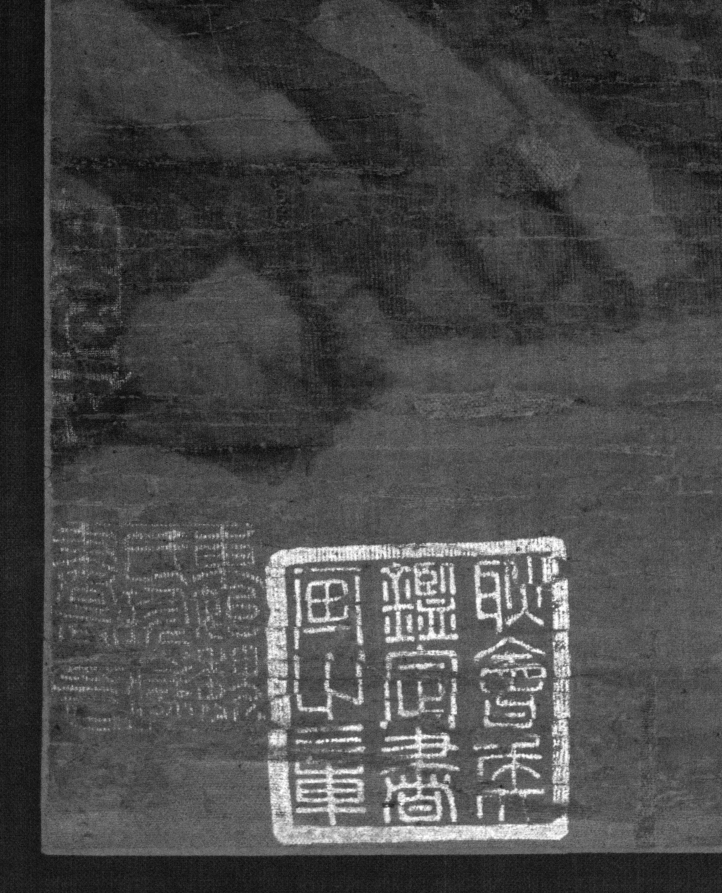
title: Summer Mountains (after Dong Yuan [active c. 937–75])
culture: China, Yuan dynasty (1271-1368)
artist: attributed to Huang Gongwang (Chinese, 1269–1354)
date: 1290–1354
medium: hanging scroll; ink and slight color on silk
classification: Painting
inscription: 【印】一峰道人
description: This monumental landscape is drawn in softly rounded strokes with darker lines frequently applied on top of lighter ones. This technique recalls one of the suggestions included in a collection of the artist's writings known as Secrets of Landscape Painting: The most difficult thing in painting is using the ink. The artist begins by using dilute ink and builds it up to the point where it begins to look right, then uses dense, black ink, applied fairly dry, and washes of deeper-toned ink. This technique distinguishes the fields from the paths, the far from the near. Huang Gongwang may have learned this technique from observing nature through the eyes of an earlier master, Dong Yuan, a painter whose style he shared.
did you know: The wet hills and moist, rich atmosphere evoke the southern Chinese summer, characterized by monsoon rains and lush growth.